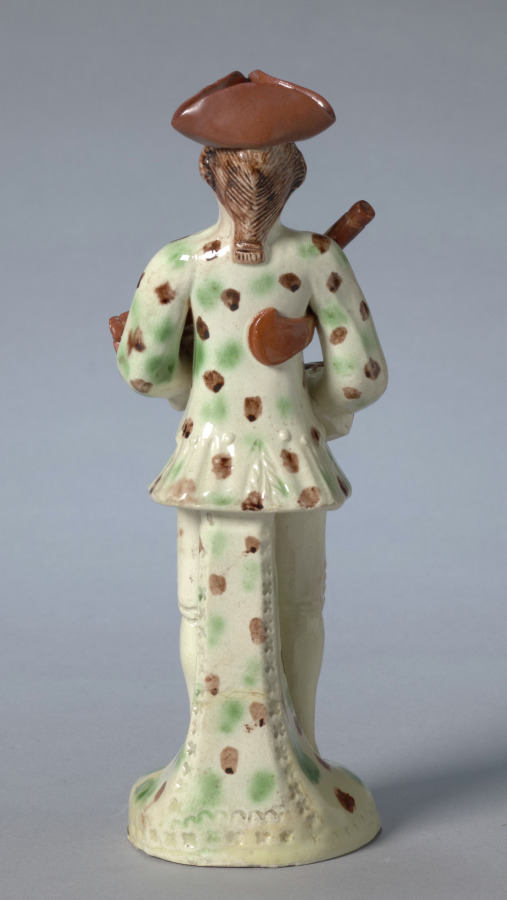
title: Bagpiper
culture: England, Staffordshire, 18th century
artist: Staffordshire Factory (British)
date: c. 1740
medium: earthenware (Astbury-Whieldon type)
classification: Ceramic